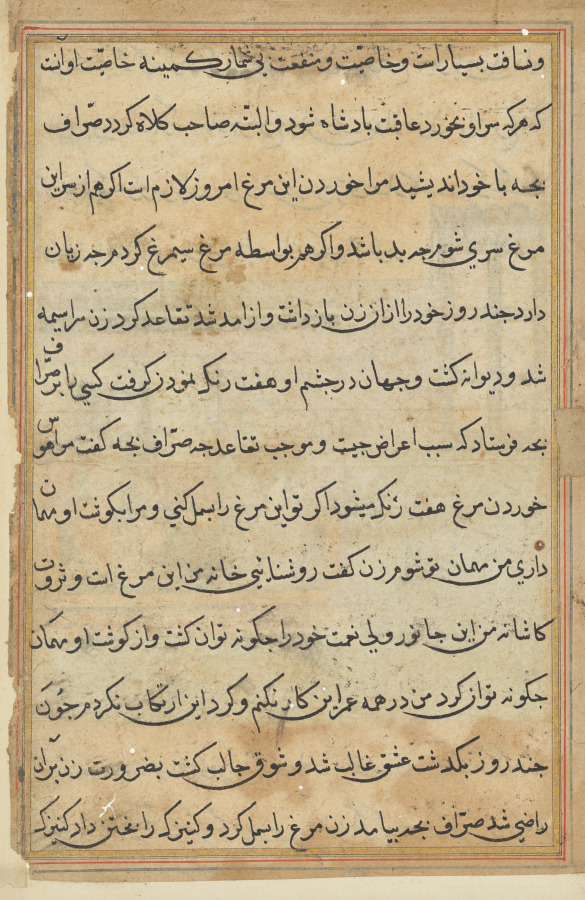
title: Page from Tales of a Parrot (Tuti-nama): text page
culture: Mughal India, court of Akbar (reigned 1556–1605)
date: c. 1560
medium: gum tempera, ink, and gold on paper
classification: Painting